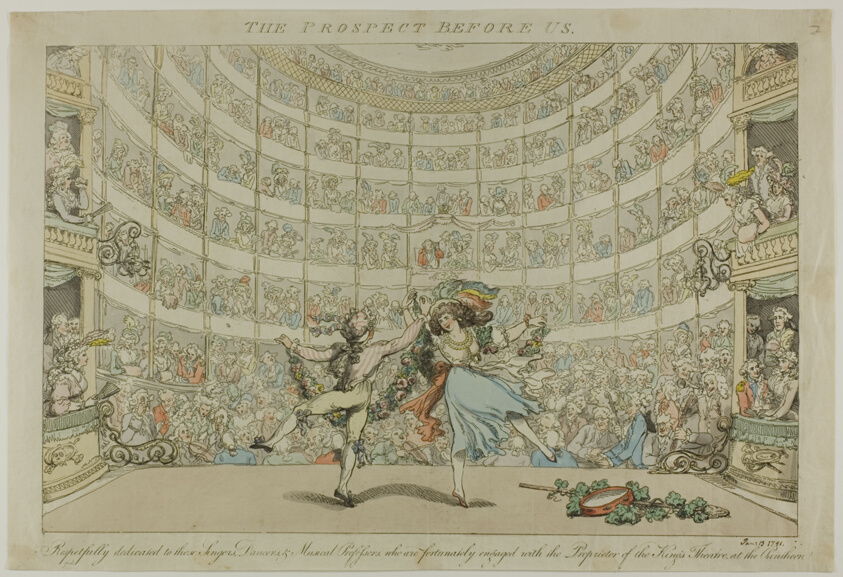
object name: Print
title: The Prospect Before Us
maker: Thomas Rowlandson (English, 1756-1827); published by S.W Fores (English, 1761-1838)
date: 1791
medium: Hand-colored etching on paper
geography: England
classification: etching; print; prints and drawing